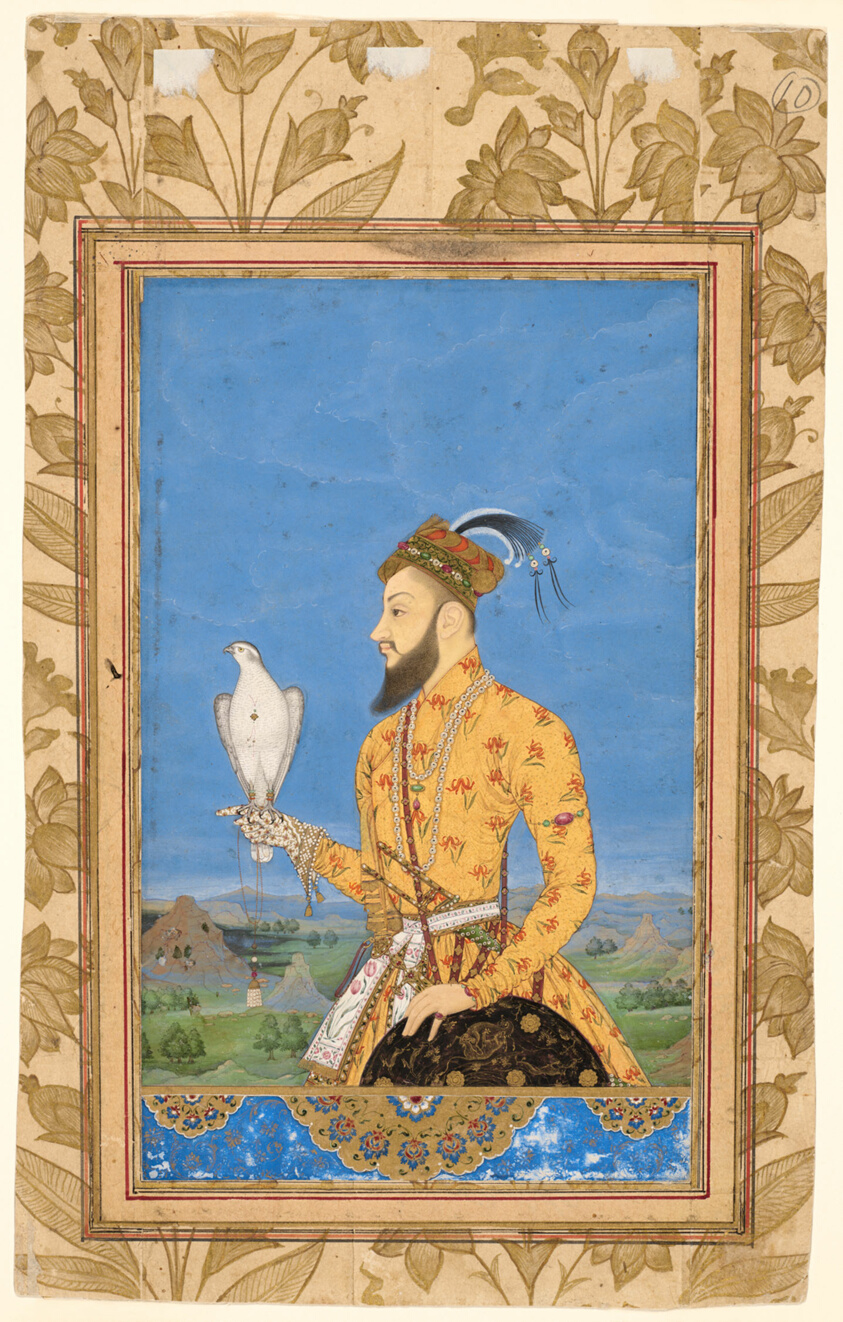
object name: Painting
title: Portrait of Prince Azam Shah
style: South Asian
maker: India; Deccan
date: Late 17th/early 18th century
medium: Opaque watercolor and gold on paper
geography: India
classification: miniature; asian art; painting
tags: animals